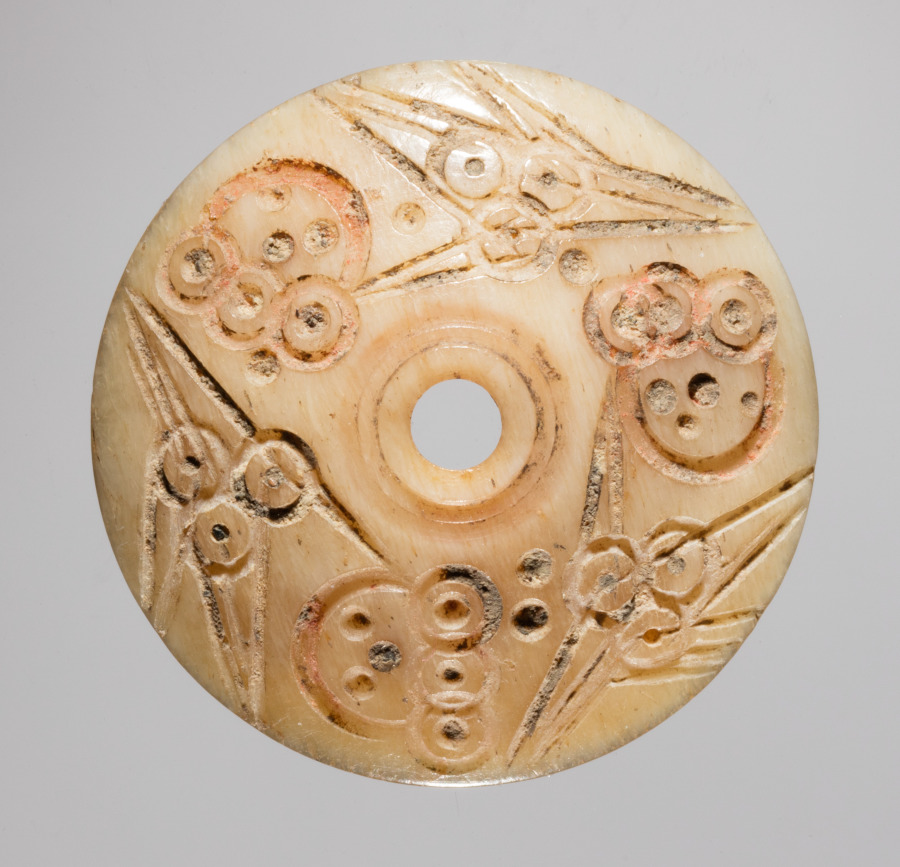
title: Spindle Whorl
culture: Iran, early Islamic period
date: 700s - 900s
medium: bone, incised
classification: Spindle Whorl